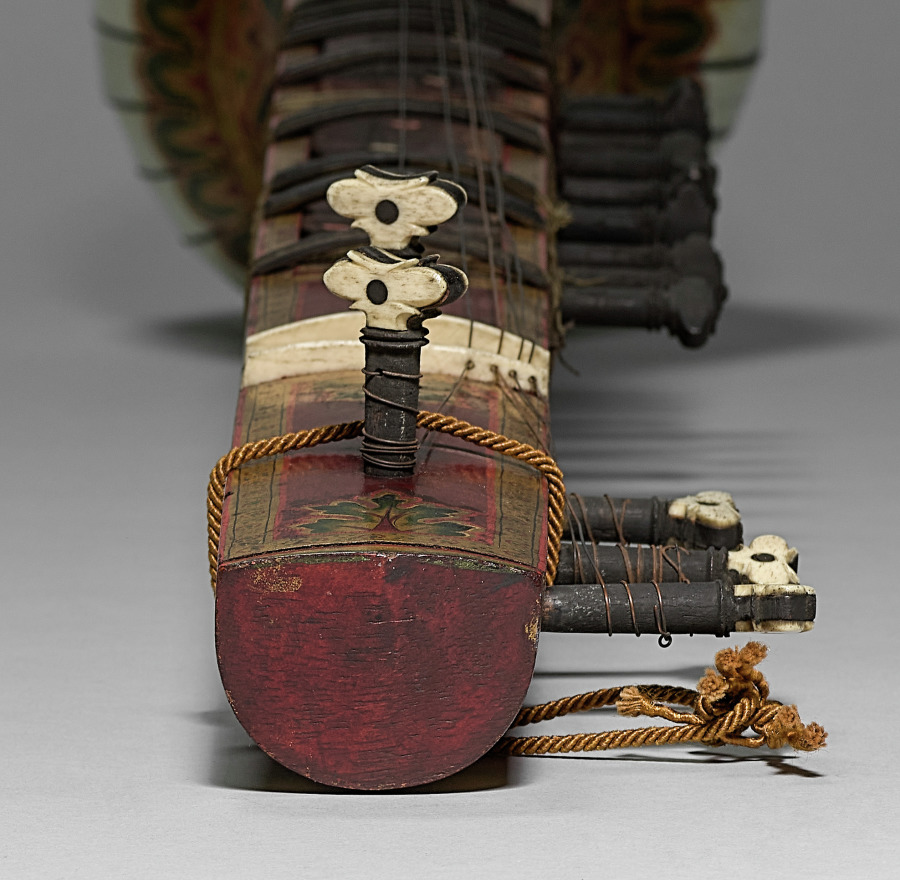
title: Sitar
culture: Eastern India, Bengal or Bangladesh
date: c. 1850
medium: Gourd and wood with pigment, ivory, and bone; copper alloy: frets; iron alloy: strings (with one modern copper replacement)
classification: Musical Instrument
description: The stringed instrument known as the sitar usually provided the central sound for the musical performances that were a constant feature of court life in India. The sitar could then be accompanied by percussion, voice, and other supporting instruments. In Raja Deen Dayal’s photograph Maharaja of Rewa in Prayer (2016.266.21), a musician strums a sitar in order to please the deities on the royal altar. The improvised compositions are played in a mode, or key, that correlates to the time of day and season of the year.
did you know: Many paintings of Indian court life depict female musicians holding and playing this kind of lightweight stringed instrument.